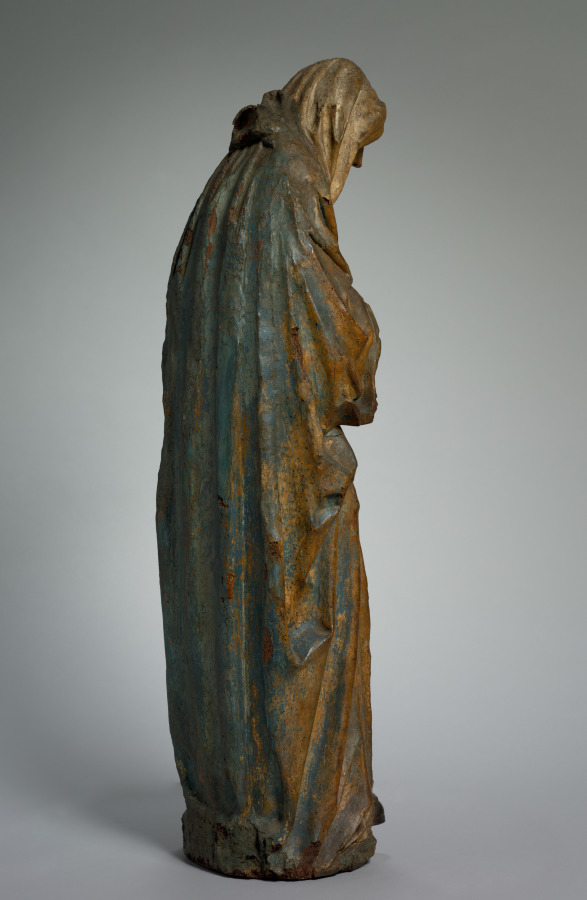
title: Virgin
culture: France, Champagne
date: 1510–15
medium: painted oak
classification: Sculpture